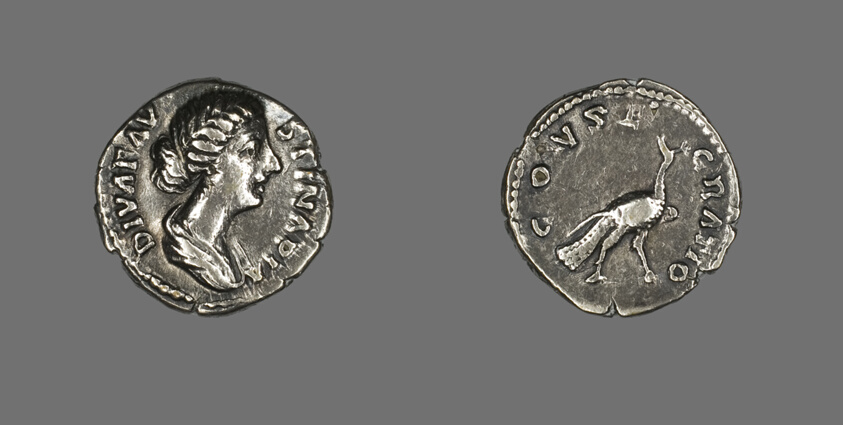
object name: Coin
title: Denarius (Coin) Portraying Empress Faustina the Younger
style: roman (ancient, style or period)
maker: Roman, minted in Rome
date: 176-180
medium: Silver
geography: Roman Empire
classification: coin; ancient art